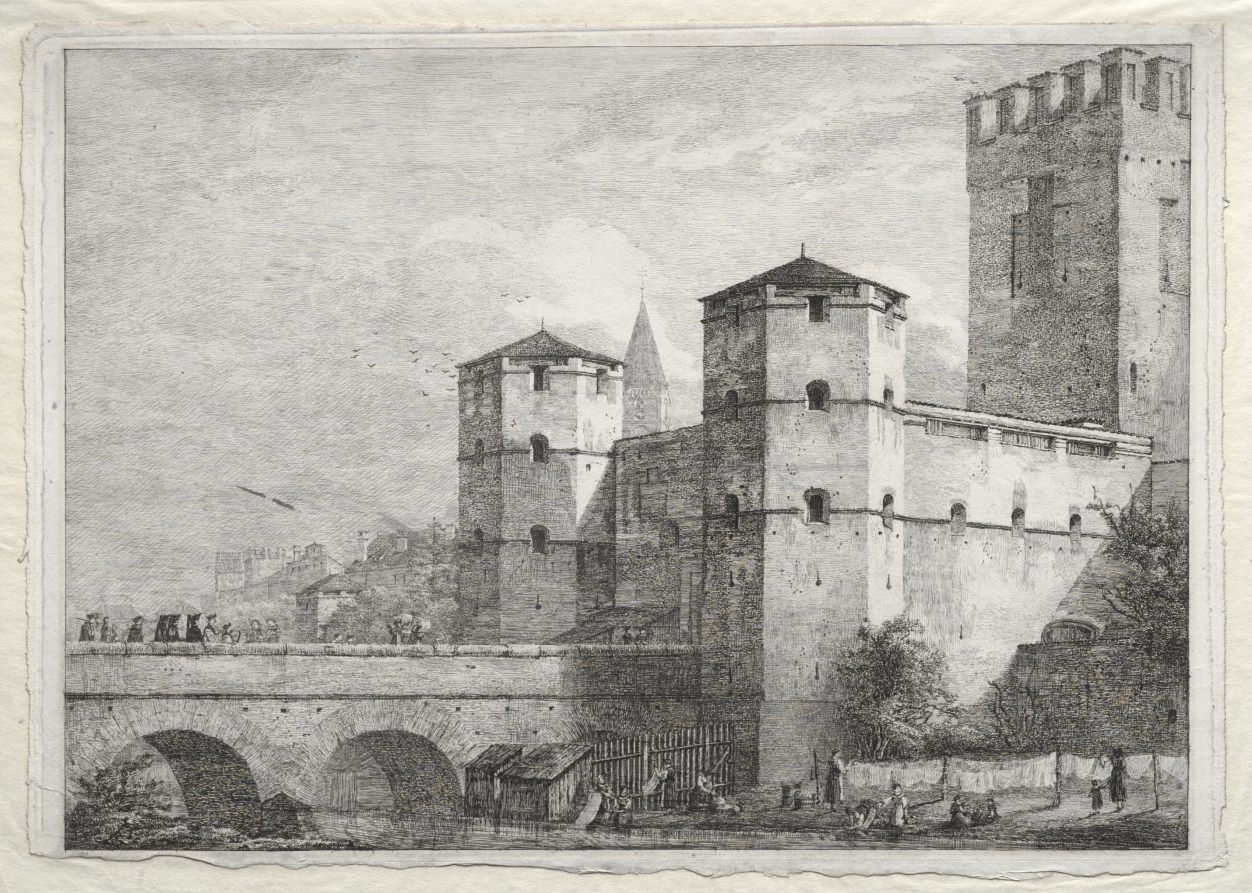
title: Munich-Hohenschwangau, Bavaria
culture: Germany, 19th century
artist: Domenico Quaglio (German, 1787–1837)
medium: etching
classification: Print